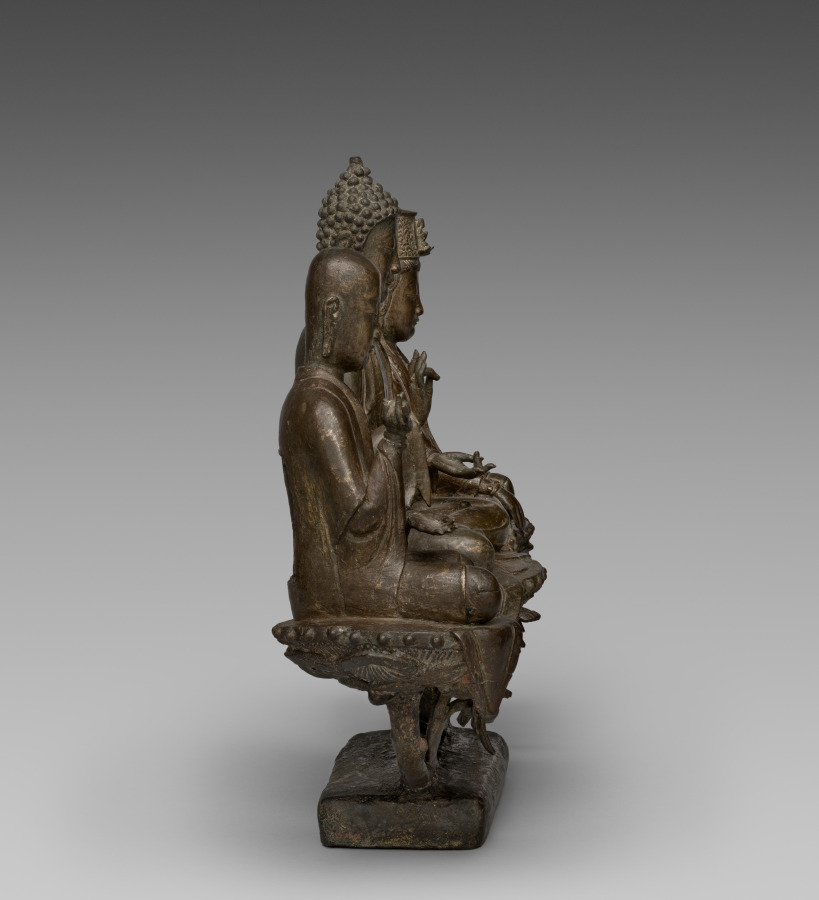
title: Amitabha Triad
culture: Korea, Joseon dynasty (1392–1910)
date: 1400s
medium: bronze with traces of gilding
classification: Sculpture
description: This bronze triad depicts Amitabha, the Buddha of Western Paradise, at the center, flanked by two bodhisattvas: Ksitigarbha on his left and Avalokiteśvara on his right. Ksitigarbha is believed to rescue those tormented beings from purgatory, while Avalokiteśvara offers relief to those suffering in the mortal realm. An exceptionally rare statue from the 1400s, this piece entered the CMA’s collection in 1918. It was discovered in Korea in 1916 by Langdon Warner (1881–1955), who was serving as the CMA’s field agent. In a letter dated December 4, 1916, Warner expressed not only his excitement upon finding the triad in a local pawn shop but also his satisfaction at purchasing it at a significantly reduced price.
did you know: The small scale suggests that this rare bronze triad might have been displayed in a personal shrine rather than a large worship hall.